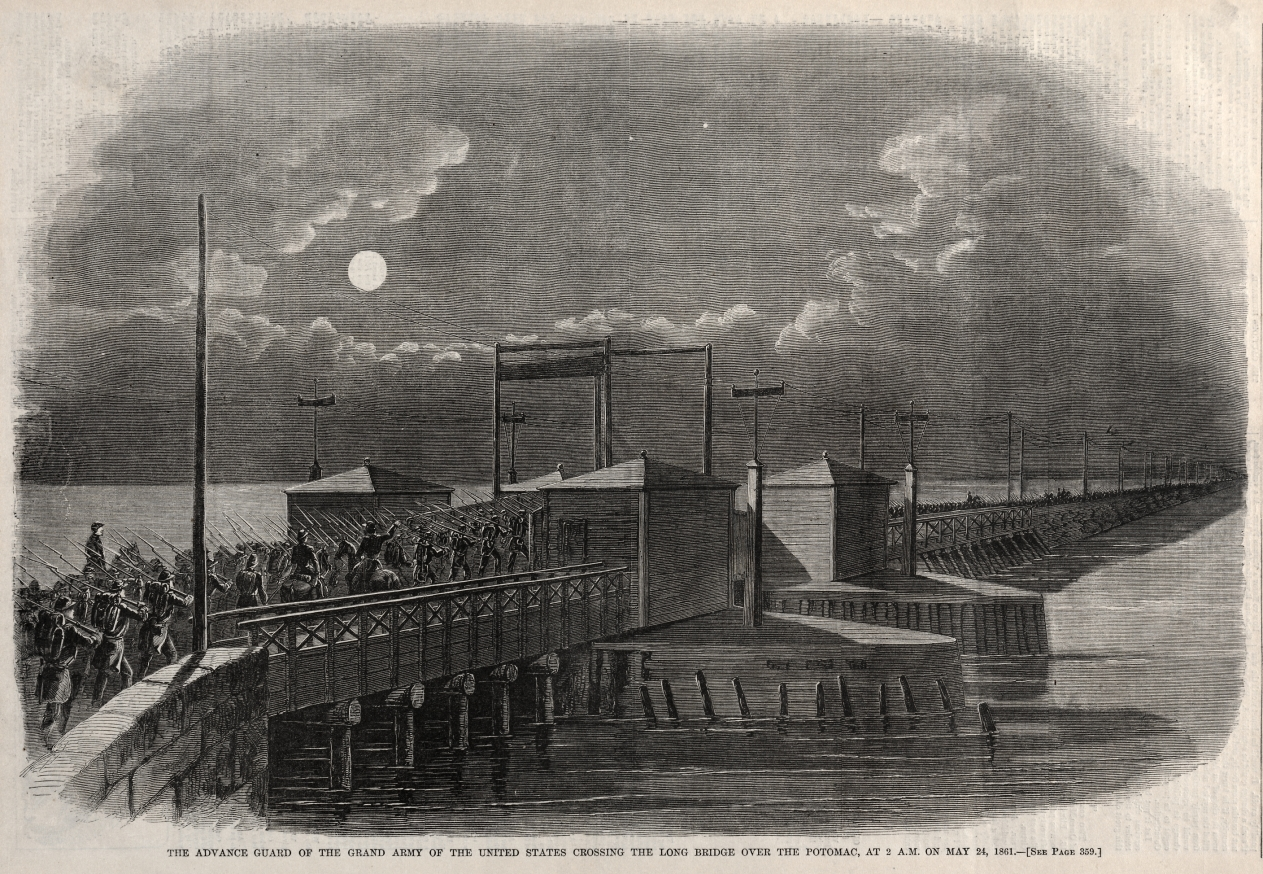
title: The Advance Guard of the Grand Army of the United States Crossing the Long Bridge over the Potomac, at 2 a.m. on May 24, 1861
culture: America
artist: Winslow Homer (American, 1836–1910)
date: 1861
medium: wood engraving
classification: Print